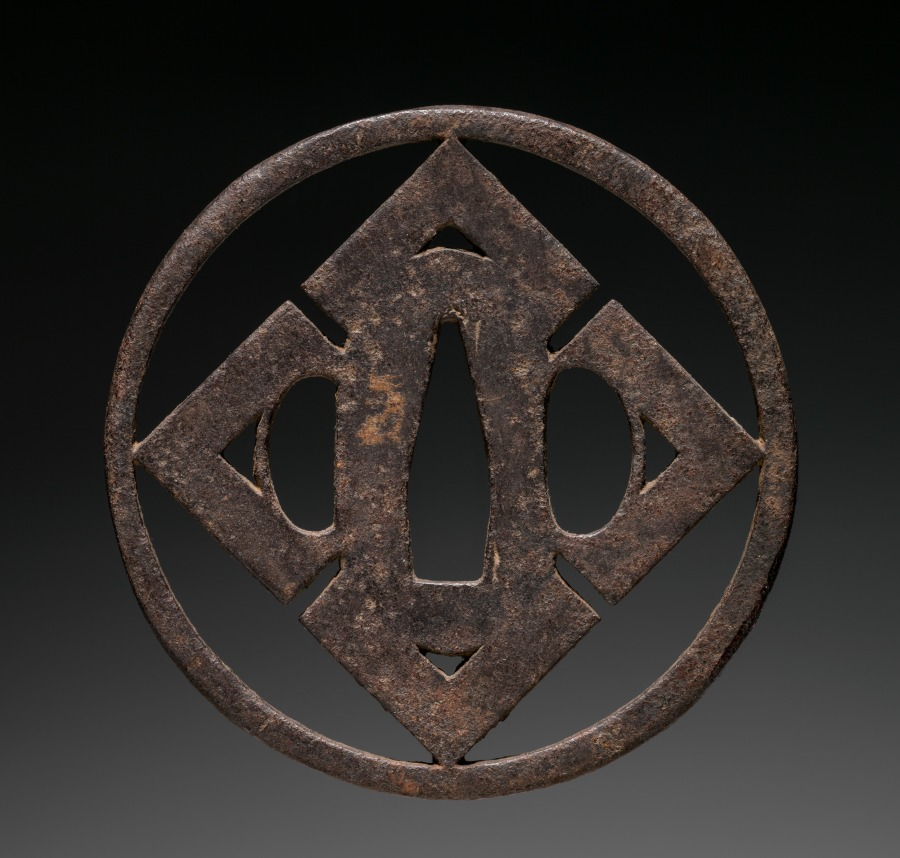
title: Sword Guard (Tsuba)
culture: Japan, Edo period (1615–1868)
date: early to mid-1800s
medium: iron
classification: Arms and Armor